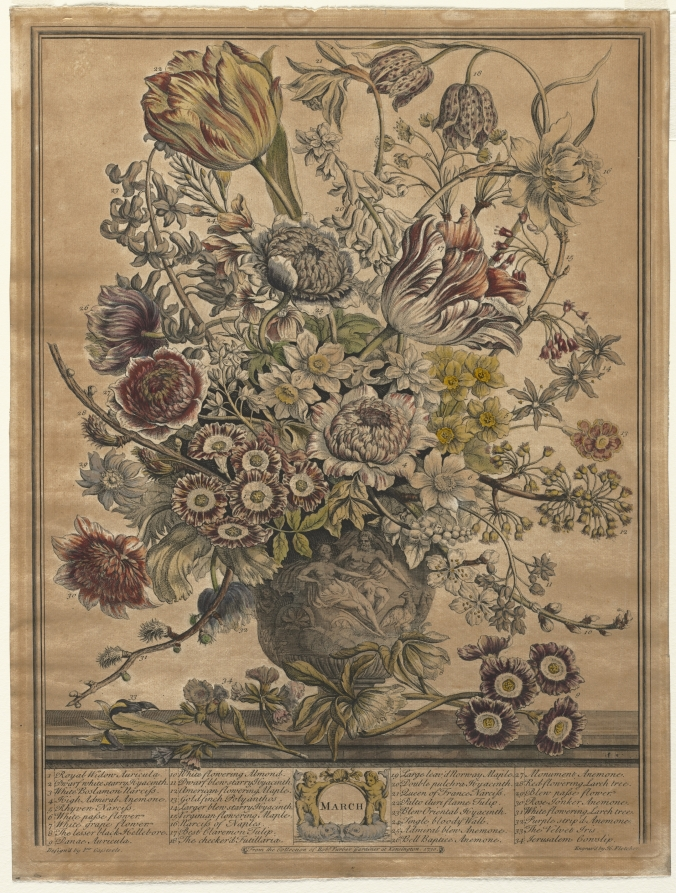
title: Twelve Months of Flowers: March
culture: England, 18th century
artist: Henry Fletcher (British, active 1715–38)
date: 1730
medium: engraving, hand-colored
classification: Print